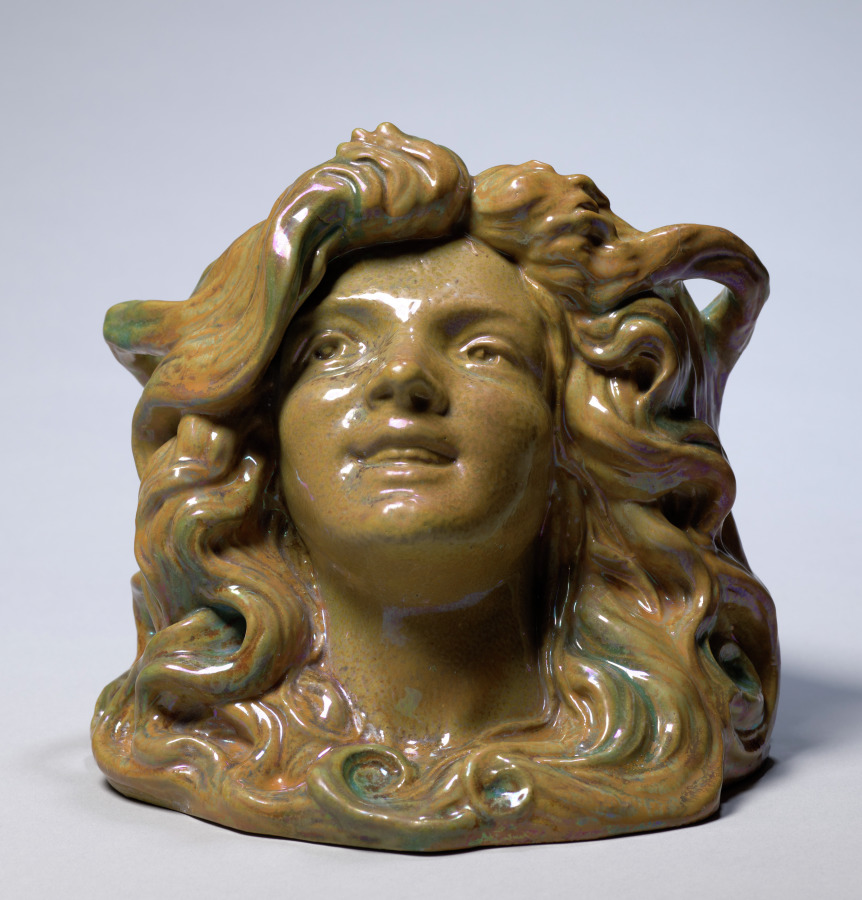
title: Vase in the Form of a Woman's Head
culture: France, late 19th Century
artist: Emile Muller (French, 1889)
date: c. 1895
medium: stoneware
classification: Ceramic